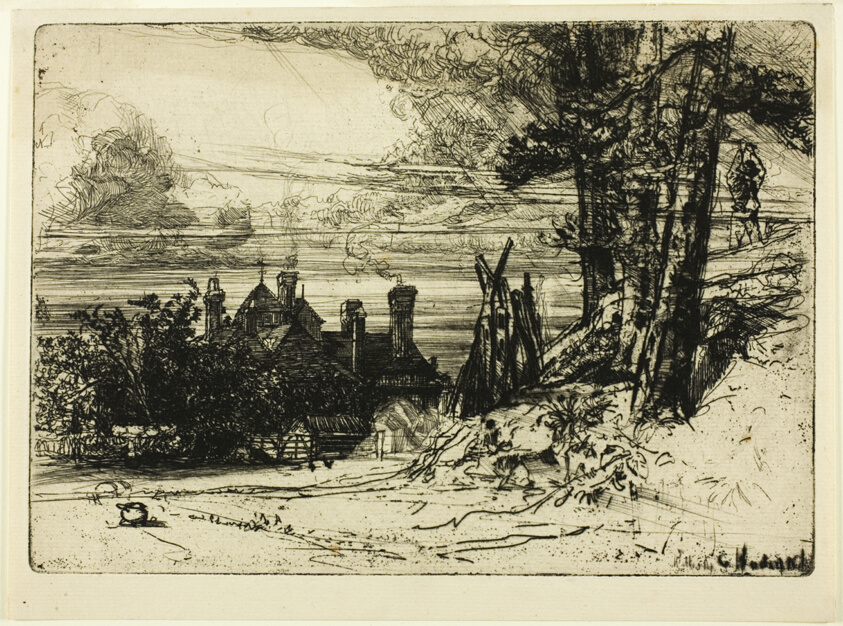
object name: Print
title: Horsley's House at Willesley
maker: Francis Seymour Haden (English, 1818-1910)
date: 1865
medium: Etching and drypoint on zinc printed on cream laid paper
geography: England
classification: etching; print; prints and drawing